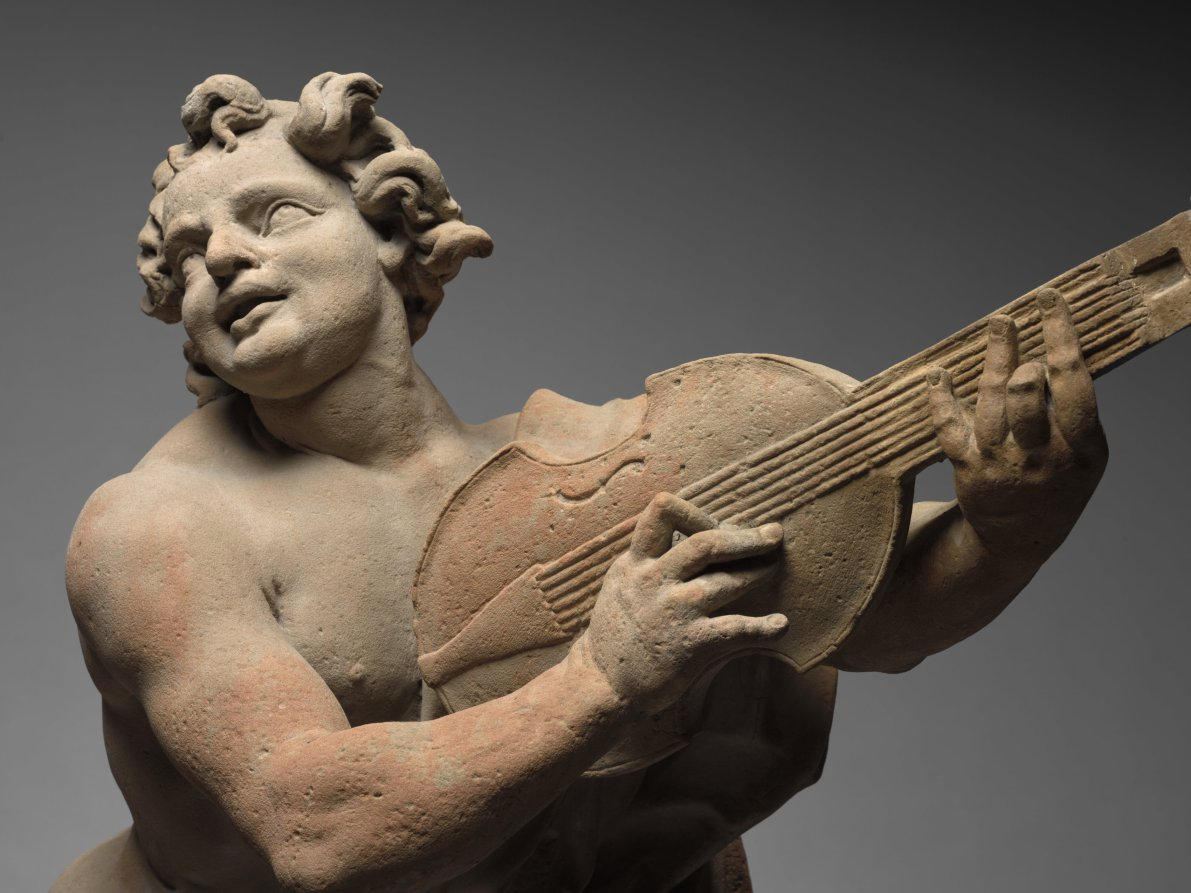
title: Orpheus and Cerberus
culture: Germany, near Bamberg, 18th century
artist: Ferdinand Tietz (Austrian, 1708–1777)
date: c. 1765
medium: sandstone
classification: Sculpture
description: This work was one of numerous sculptures Tietz created for the gardens of Schloss Seehof, near Bamberg in Bavaria (Germany), the summer residence of the Prince Bishops of Bamberg. The exaggerated forms of Orpheus's face and musculature caricature the idealized proportions of classical sculpture. A further parody exists with his companion: the usually terrifying hound Cerberus is here nothing more than a docile puppy, sitting calmly at Orpheus's feet. Meant to be viewed outdoors, on a high pedestal and from a distance, this work is less finely detailed than sculptures Tietz made for indoor settings at Seehof.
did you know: Taught to play the lyre by the Greek god Apollo, Orpheus's legendary musical abilities had the power to charm animals.